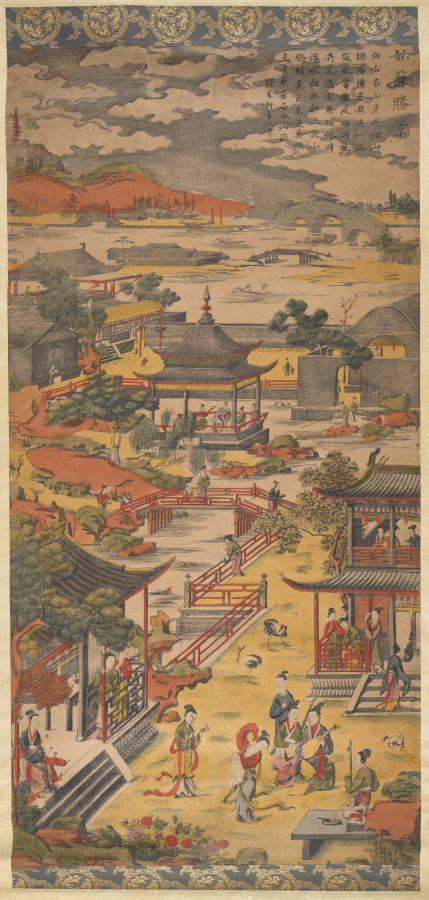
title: Scenic View of Suzhou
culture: China, Qing dynasty (1644–1911), Qianlong reign (1736–95)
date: 1736–95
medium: Hanging scroll; polychrome woodblock print; ink and color on paper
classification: Print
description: In the 1600s, printing flourished in such Jiangnan cities as Nanjing, Suzhou, Hangzhou, and Huizhou, evolving from privately enjoyed illustrated books printed in color to more commercialized single-sheet color prints that were hung on walls and became part of the rich urban visual culture.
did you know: Woodblock printing in color reached a height in China in the 1600s to 1700s. The prints were executed by means of sets of separate blocks, each carved to print a different color.